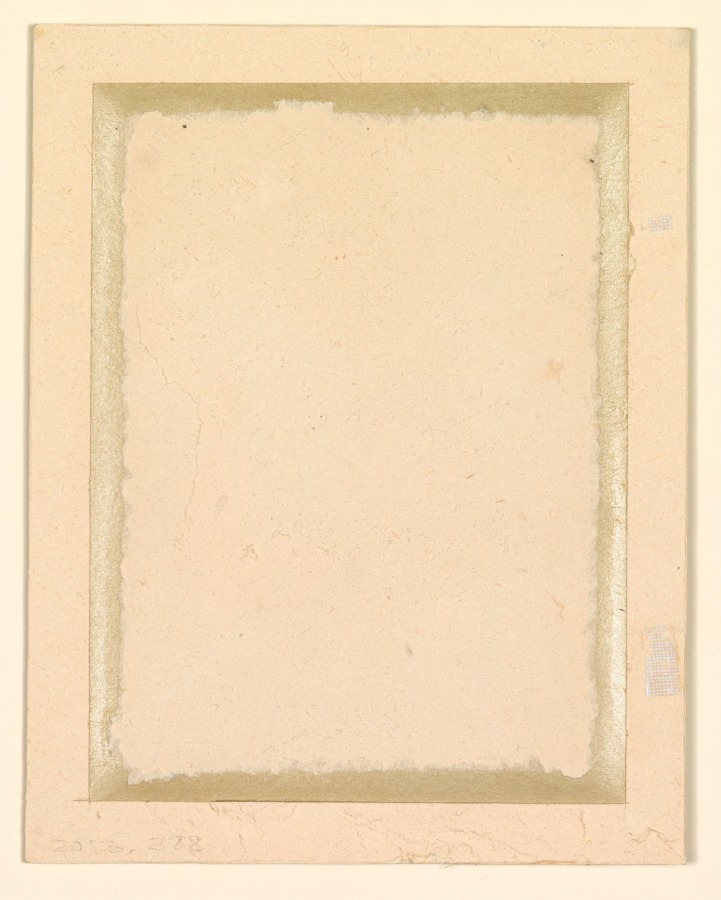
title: A dancing dervish and three musicians, from a Divan (Collected Poems) of Urfi (Persian, 1555–1591)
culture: India, Muhammadpur, Bijapur, Deccan, 17th century; made for Sultan Muhammad Adil Shah (r. 1627–56)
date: 1637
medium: Gum tempera and gold on paper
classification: Painting